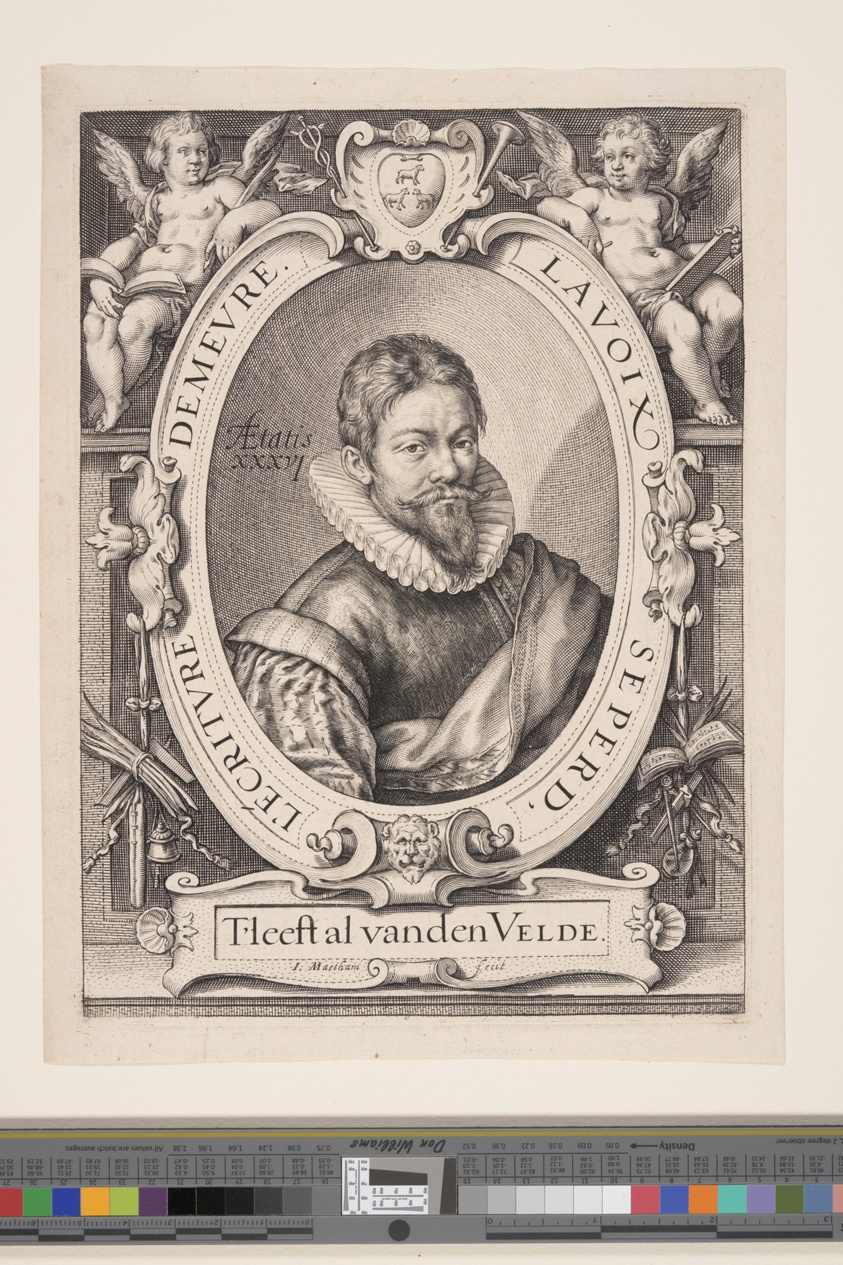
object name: Print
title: Jan van de Velde the Elder, Calligrapher in Haarlem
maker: Jacob Matham (Dutch, 1571–1631)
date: c. 1604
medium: Engraving on laid paper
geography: Netherlands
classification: print; engraving; paper; prints and drawing